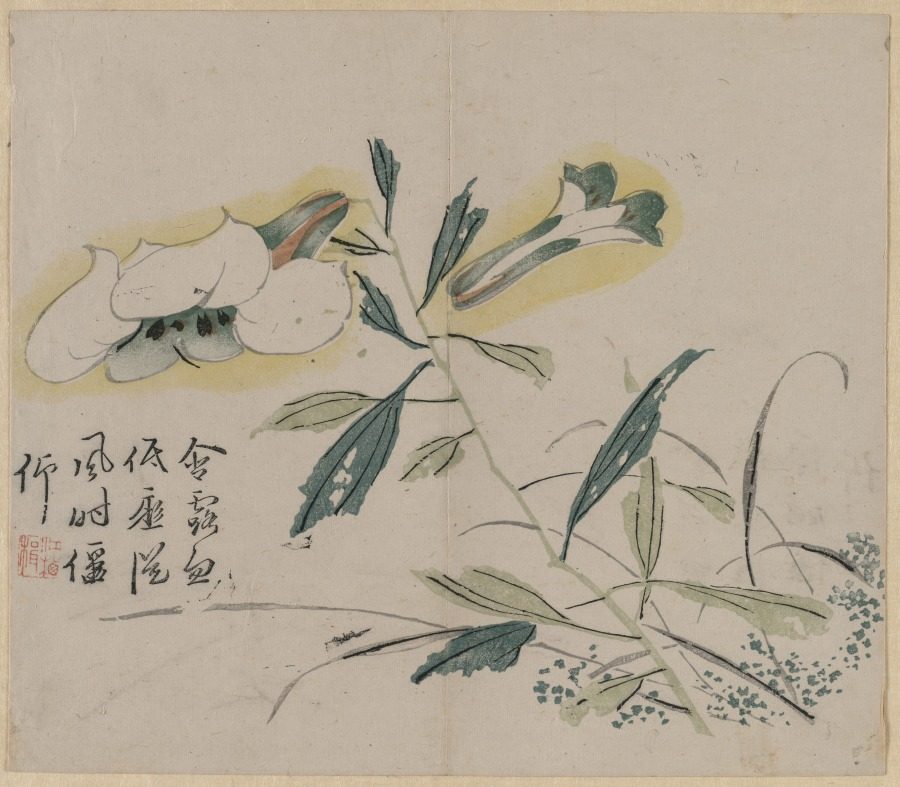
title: Flowering Lily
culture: China, Qing dynasty (1644-1911)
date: 18th Century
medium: color woodblock print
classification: Print